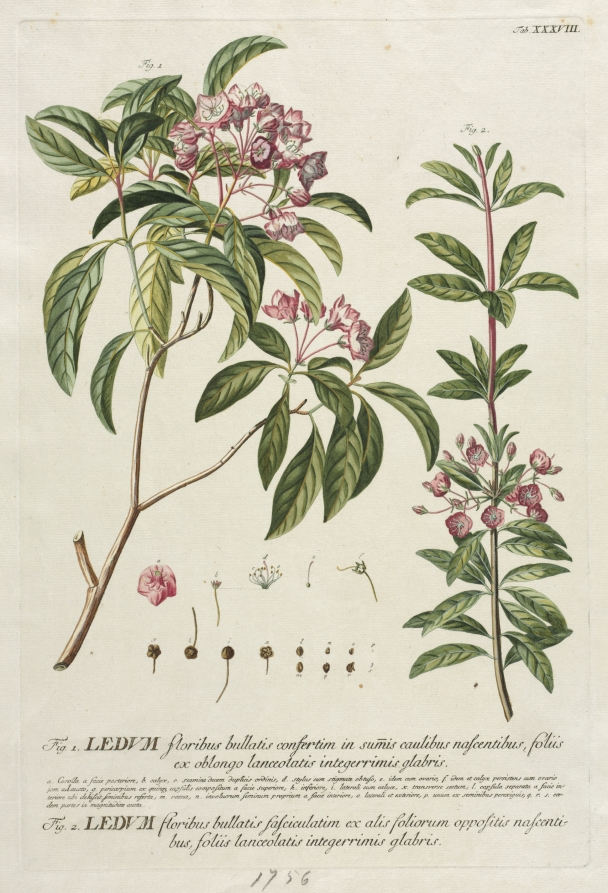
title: Plantae Selectae: No. 38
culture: Germany, 18th century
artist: Georg Dionysius Ehret (German, 1708–1770)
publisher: Christopher Jacob Trew (German, 1695–1769)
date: published 1750–73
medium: engraving, hand-colored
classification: Print